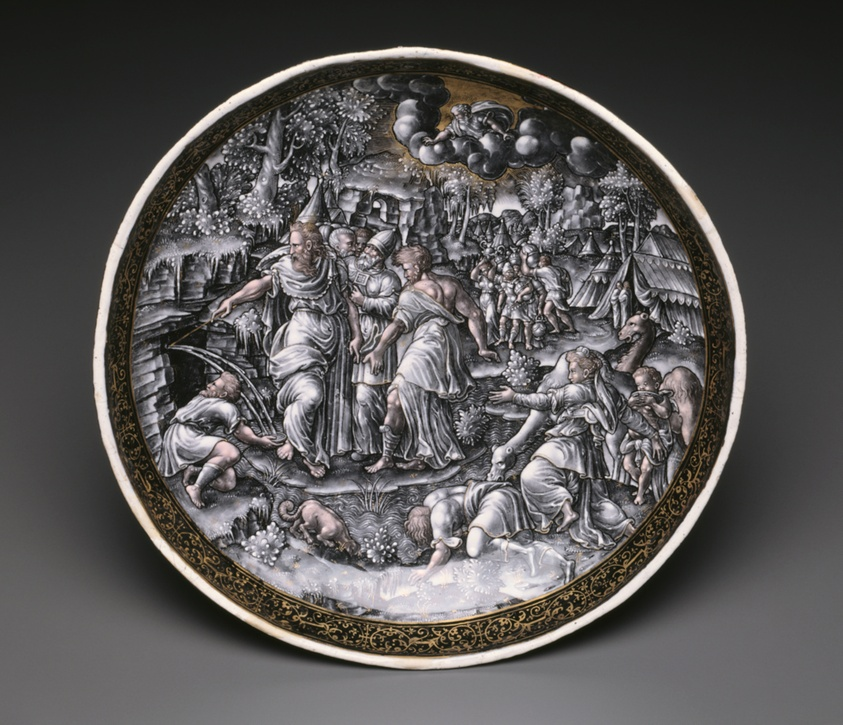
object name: Metalwork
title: Tazza with Moses Striking Water from the Rock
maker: Master I. C. (French, active 1553-85)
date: 1570/75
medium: Painted enamel on copper with gilding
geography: Limoges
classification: copper; metalwork; european decorative arts; decorative arts